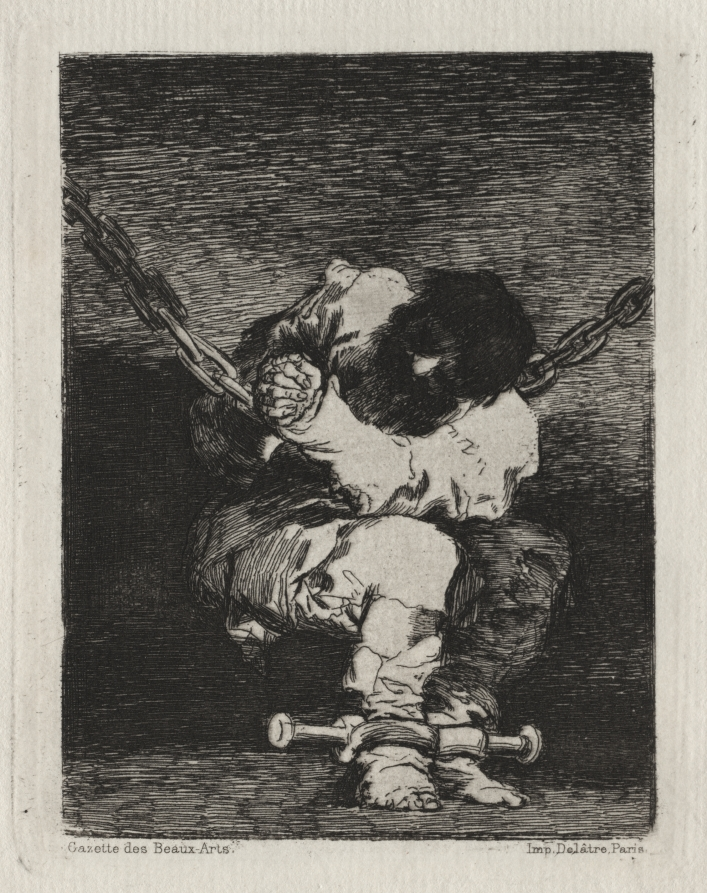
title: The Little Prisoner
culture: Spain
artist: Francisco de Goya (Spanish, 1746–1828)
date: c. 1810–15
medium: etching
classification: Print